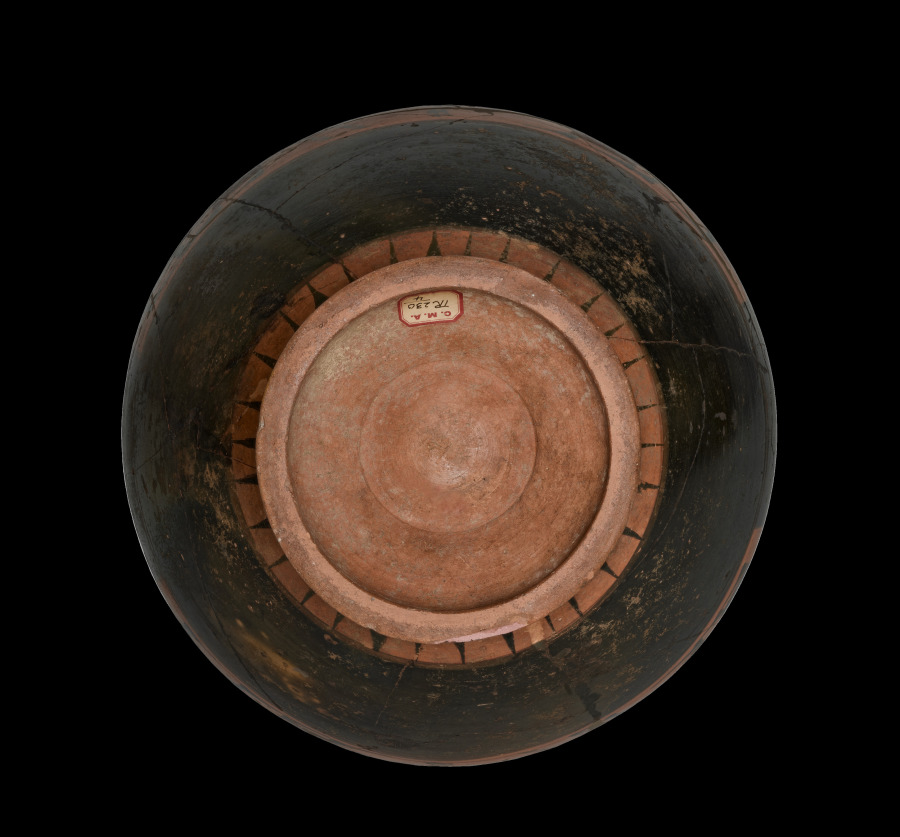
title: Black-Figure Amphora (Type B; Storage Vessel): Men and Horses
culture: Greek, Attic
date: c. 540 BCE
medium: ceramic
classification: Ceramic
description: Although pieced together from many fragments (with some still missing), this sizeable amphora remains impressive. On each side, a horsemen and four figures are contained within a large, reserved panel beneath a lotus-palmette frieze. The scenes, which differ slightly from one another in various details, cannot be identified with known historical or mythological figures or episodes.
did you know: The two sides of this amphora are very similar—a horseman flanked by pairs.